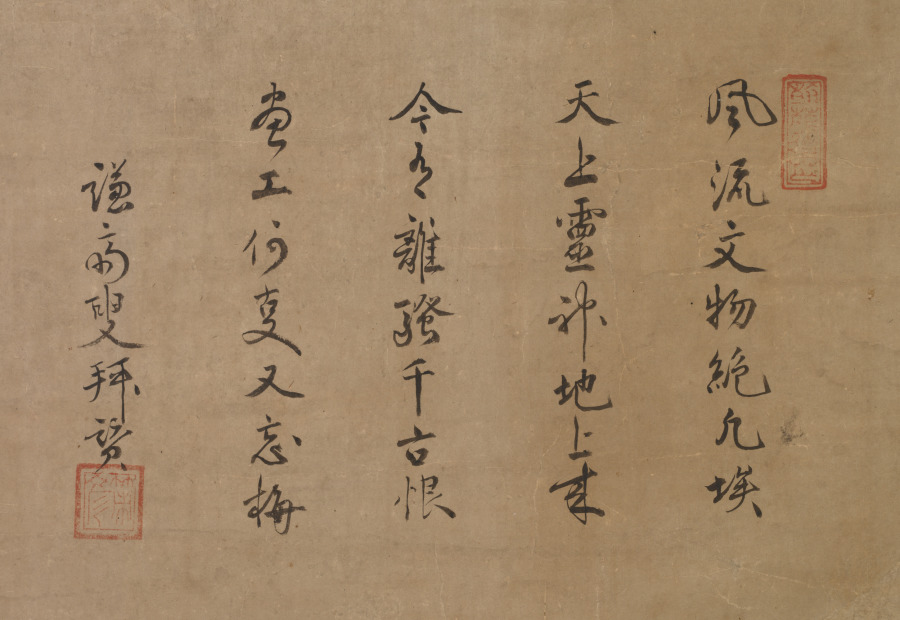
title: Portrait of Sugawara Michizane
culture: Japan, Muromachi period (1392–1573)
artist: Yōgetsu (Japanese, active late 1400s to early 1500s)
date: late 1400s–early 1500s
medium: hanging scroll; ink and color on paper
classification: Painting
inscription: four-line inscription signed "Sakugen Shūryō" (1501-1579) accompanied by two seals unread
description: Sugawara Michizane (845–903) was a Kyoto aristocrat who died in exile in Dazaifu in Japan’s southern island of Kyushu, having been slandered at court. His vengeful spirit was later pacified by the construction of shrines in his name. His image was incorporated into the repertoire of Zen Buddhist figure painting, which included bodhisattvas, Daoist immortals, and other enlightened beings. Eminent monk Sakugen Shūryō (1501–1579) inscribed this work, which was painted by monk-painter Yōgetsu of Kyushu, who traveled east to study either in Kyoto or Kamakura. The Chinese-style poem is an ode to Michizane in his guise as the deity Tenjin.